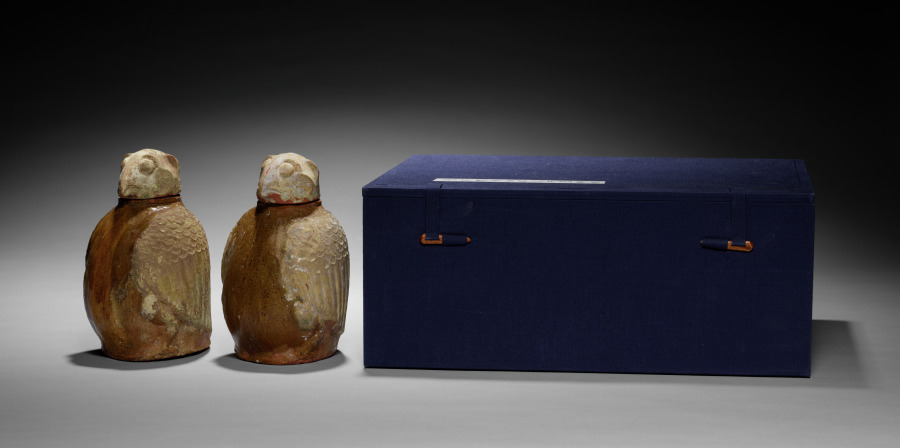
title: Pair of Owl-shaped Jars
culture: China, Henan province, Western Han dynasty (206 BCE–8 CE)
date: 206 BCE–9 CE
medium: Amber-brown glazed low-fired pottery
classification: Ceramic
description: Pottery vessels in the shape of owls were made since Neolithic times and throughout the Bronze age. These jars in the form of vigilant owls may have provided a tomb occupant with grain in the afterlife. However, the meaning of these mysterious birds and the association of the owl motif with burial sites in China is not fully understood.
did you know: Each jar cover is modeled in the shape of an owl's head.